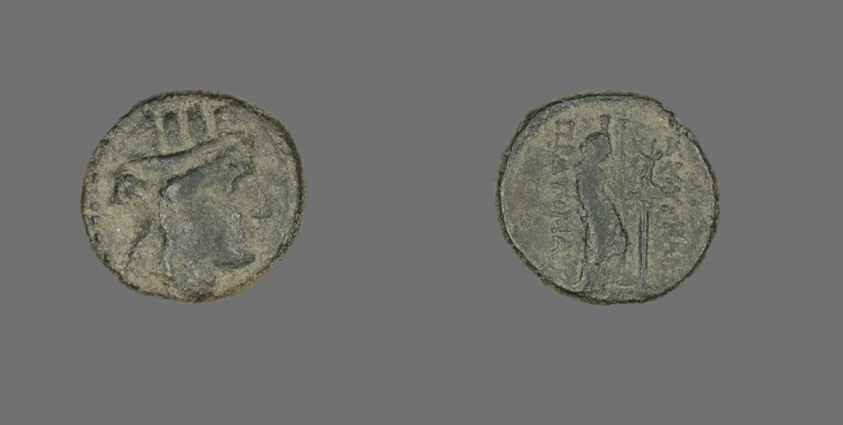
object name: Coin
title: Coin Depicting the Goddess Kybele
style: greek, ancient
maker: Greek; Smyrna, Ionia (now Izmir, Turkey)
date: 2nd century BCE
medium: Bronze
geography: Smyrna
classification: coin; ancient art